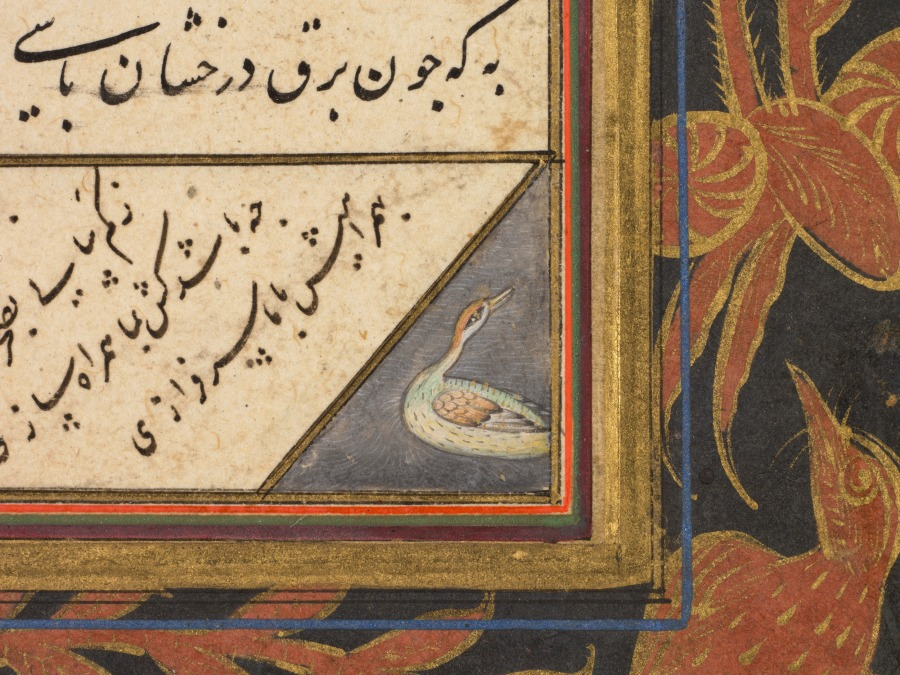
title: Folio B: Folio from the "Five Treasures" (Panj Ganj) of Jami (recto)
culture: Northern India, Mughal, early 17th century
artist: Mushfiq (Indian, active early 1600s)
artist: and others (Indian)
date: 1520–1607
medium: Gum tempera, ink, and gold on paper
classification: Painting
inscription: The miniature signed at upper left: ' amal - i Mushfiq sana 1015 (the work of the Mushfiq year 1015) Text on verso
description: This page contains two different texts, one written diagonally in the border and the other in the two central columns. The section of poetry in the border describes an episode from Joseph’s childhood in which his older brothers suggest to Jacob, their father, that they take Joseph into the countryside so that the boy can learn the area, although they actually plan to kill him. The poem in the central columns advises the reader to smile often, as a smile is sweeter and more pleasing than sugar.